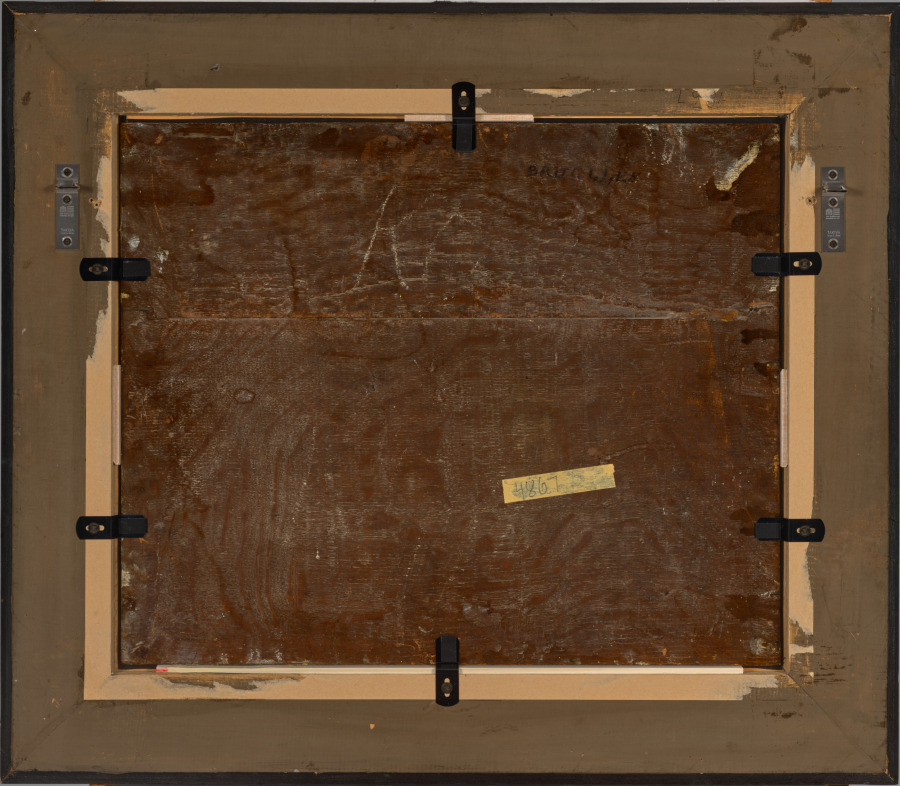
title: Lions and Fox in a Rugged Landscape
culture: Dutch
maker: Roelant Savery (Flemish, 1576–1639)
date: 1576–1637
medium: Oil on panel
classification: Painting